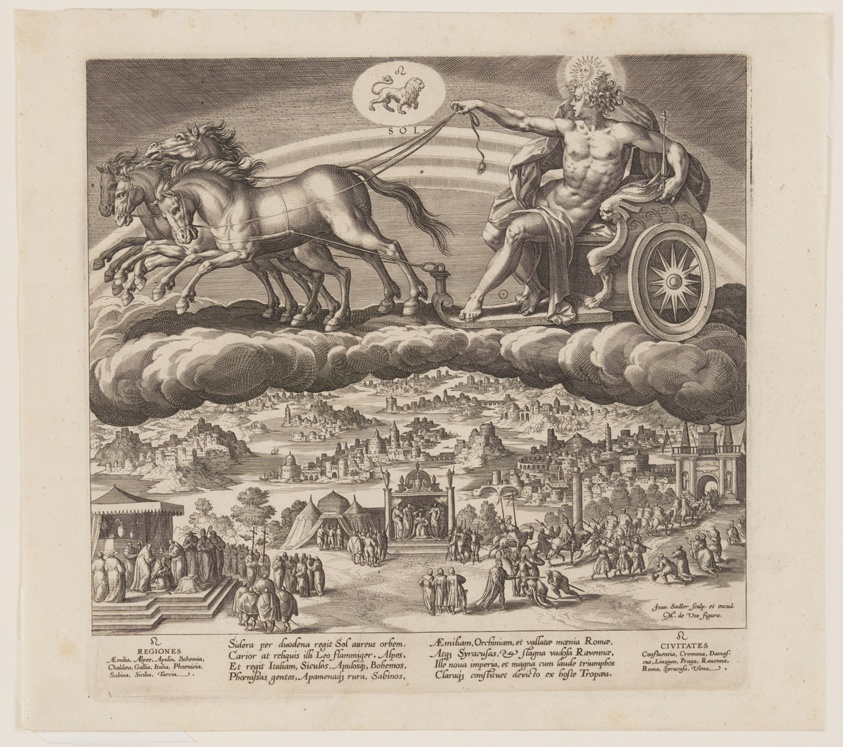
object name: Print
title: The Sun, from The Seven Planets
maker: Jan Sadeler I (Flemish, 1550–1600); after Maarten de Vos (Flemish, 1532–1603)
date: 1585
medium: Engraving on ivory laid paper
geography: Flanders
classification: engraving; paper; print; prints and drawing